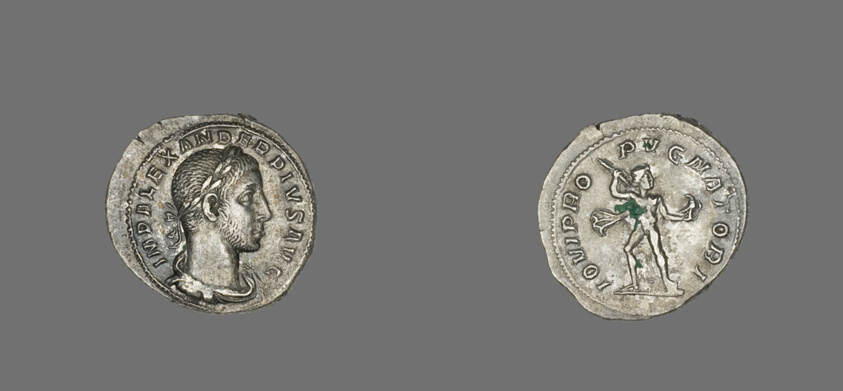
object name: Coin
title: Denarius (Coin) Portraying Emperor Alexander Pius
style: imperial (roman), roman (ancient, style or period)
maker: Roman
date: 231-235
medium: Silver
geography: Rome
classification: coin; ancient art